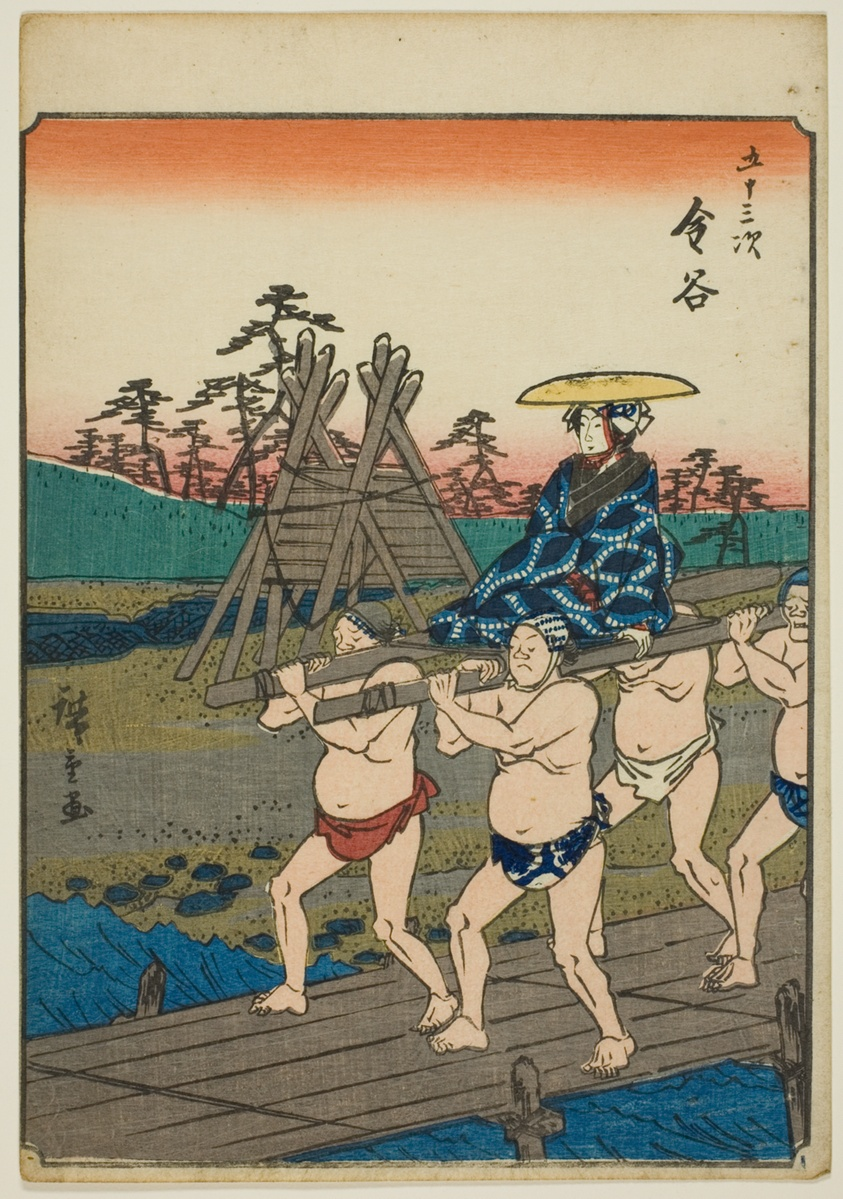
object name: Print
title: Kanaya, from the series "Fifty-three Stations [of the Tokaido] (Gojusan tsugi)," also known as the Figure Tokaido (Jinbutsu Tokaido)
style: Japanese (culture or style)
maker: Utagawa Hiroshige 歌川 広重; Japanese, 1797-1858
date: 1852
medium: Color woodblock print; chuban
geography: Japan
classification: woodblock print; print